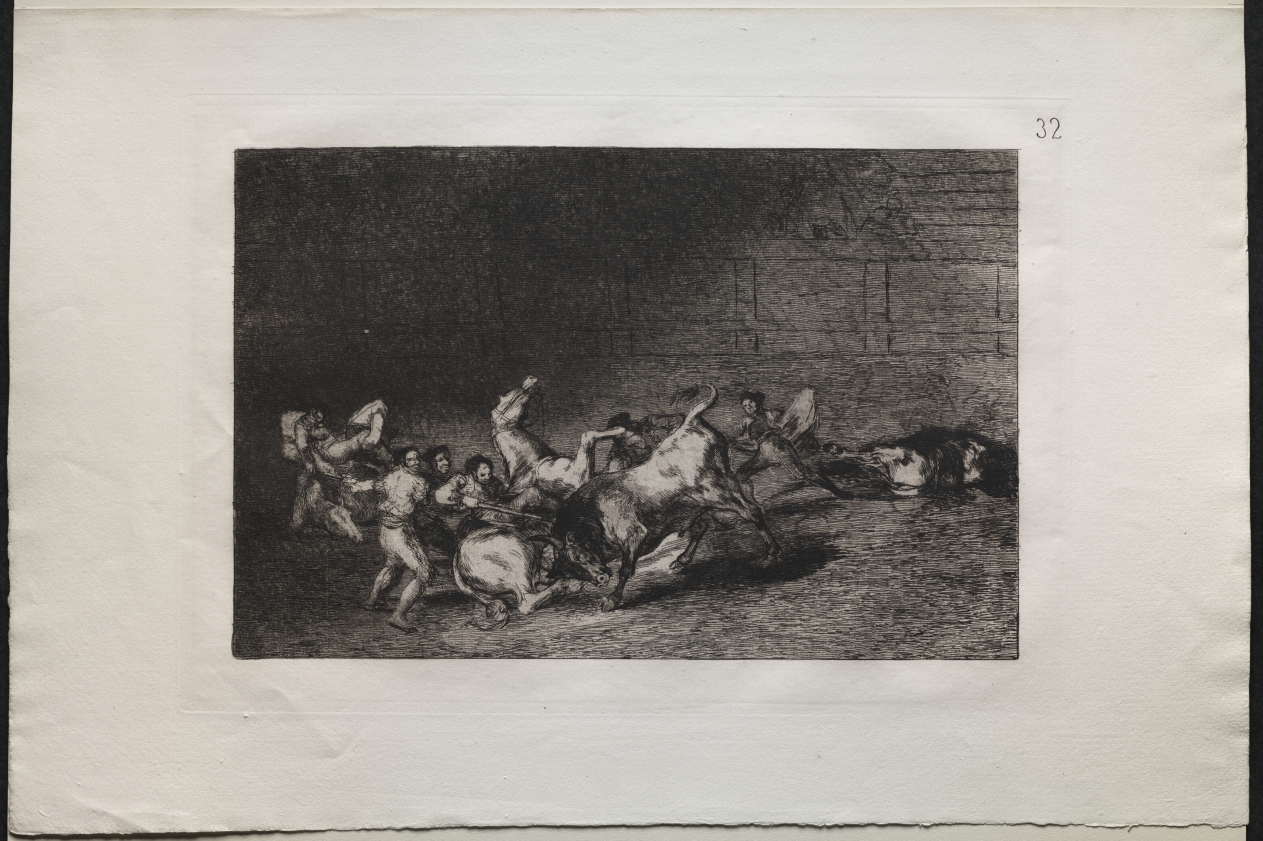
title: Bullfights: Two Teams of Picadors Thrown One After the Other by a Single Bull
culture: Spain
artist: Francisco de Goya (Spanish, 1746–1828)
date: 1816, printed 1876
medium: engraving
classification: Print